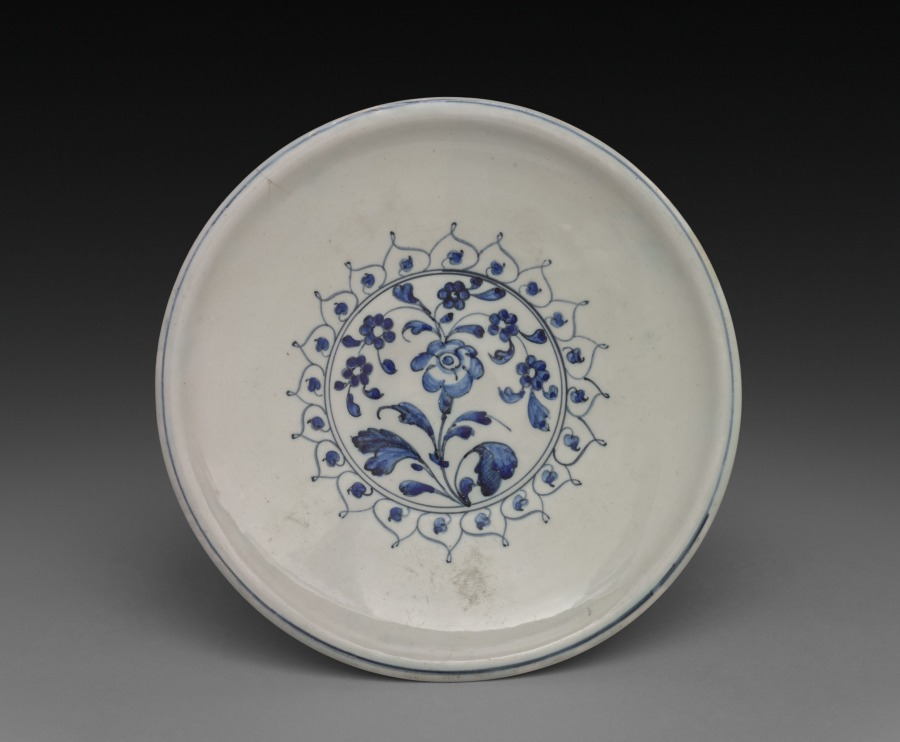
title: Plate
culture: Italy, 16th century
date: 1575–87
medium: soft-paste porcelain (called Medici porcelain)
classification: Ceramic